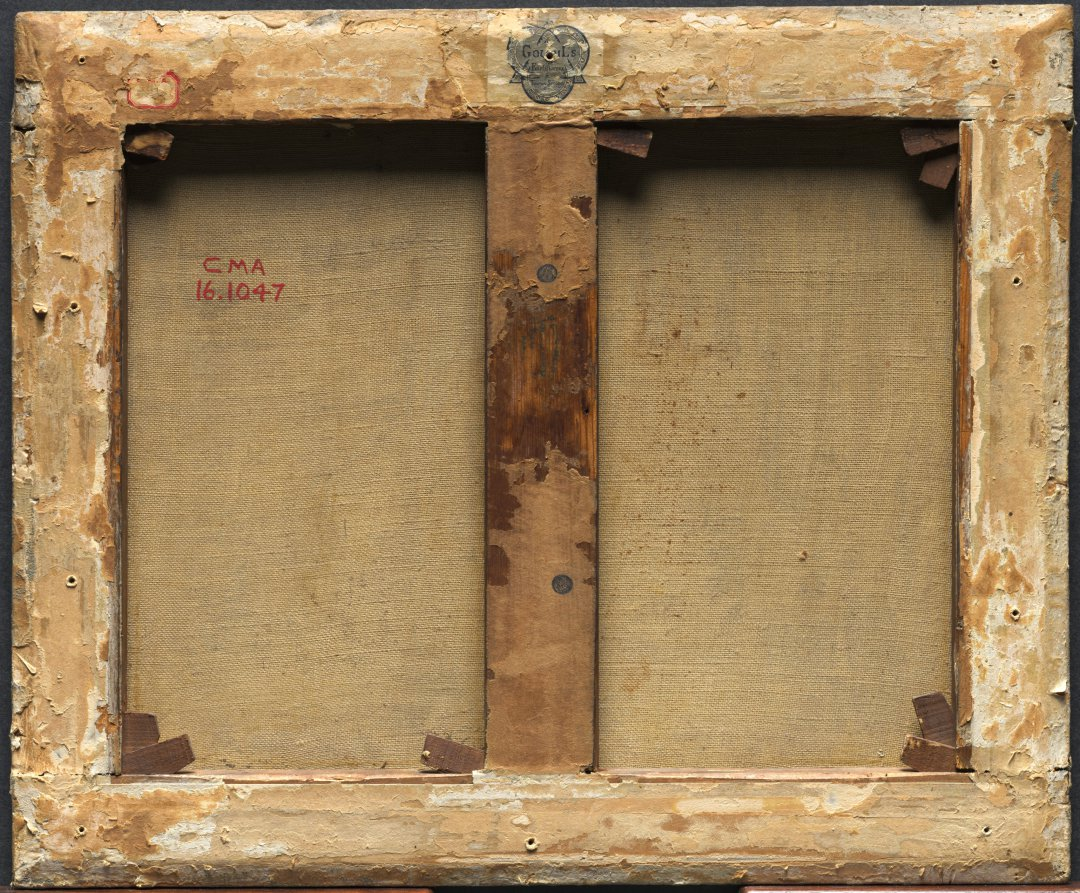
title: Willows and Farmhouse at Sainte-Catherine-lès-Arras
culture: France, 19th century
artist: Jean Baptiste Camille Corot (French, 1796–1875)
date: 1871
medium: oil on fabric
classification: Painting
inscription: Signed lower left: corot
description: With its quiet water and sky, fluffy trees, and other foliage flecked with light, this picture exemplifies the style that won Corot success with a wide public. It was painted during the artist's stay at Arras (about 100 miles north of Paris) in 1871.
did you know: Corot began his career as a draper and his exposure to the colors and textures of fabrics helped him develop an astute aesthetic sense.